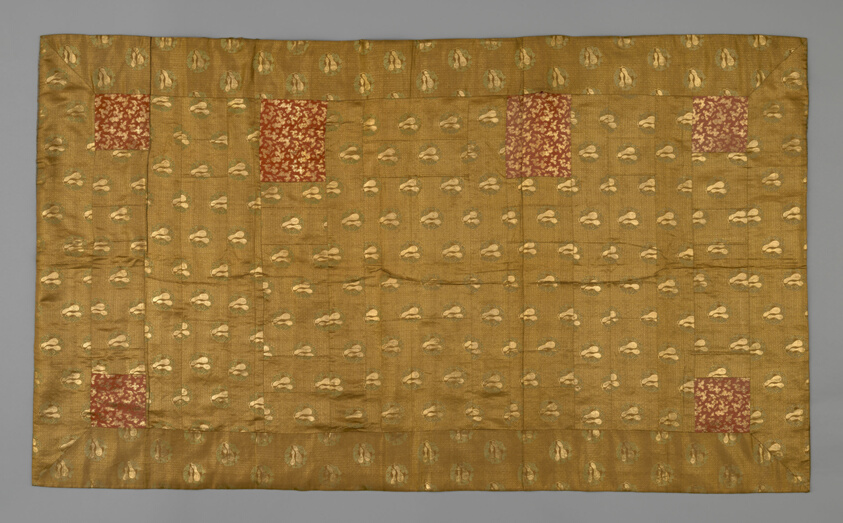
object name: Textile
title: Kesa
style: late edo, edo (japanese period)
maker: Japan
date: late Edo period (1789–1868), mid–19th century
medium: Silk and gold-leaf-over-lacquered-paper strips, warp-float faced 4:1 satin weave with supplementary patterning wefts bound in weft-float faced 1:2 'Z' twill interlacings; patches: silk and gold-leaf-over-lacquered-paper strips, warp-float faced 2:1 'Z' twill weave with weft-float faced 1:2 'Z' twill interlacings of secondary binding warps and supplementary patterning wefts; lined with silk, 4:1 satin damask weave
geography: Japan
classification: textile; liturgical - buddhist; costume; weaving